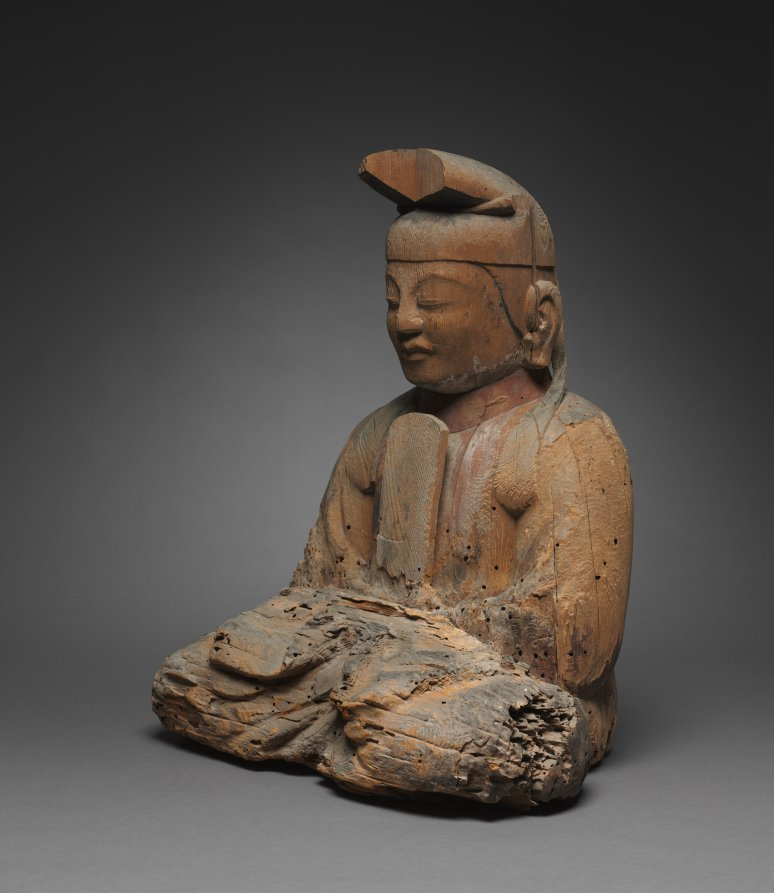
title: Shinto Deity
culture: Japan, Heian period (794–1185)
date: 900s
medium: wood, with traces of polychromy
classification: Sculpture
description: These sculptures represent kami, the name for deities associated with the Japanese religious tradition known as Shinto. They are said to have originally been created for the Usa Hachiman shrine in Oita on the island of Kyushu. Usa Hachiman Shrine houses four main kami: Hime Okami, who assists those engaged in agriculture and sea travel; the legendary 5th-century emperor Ojin deified as the kami Hachiman; Empress Jingu; and the kami of Mount Kawara, who aids copper miners. The identities of these two figures are unknown, but they belong to a larger group containing at least three other deities.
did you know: Traces of pigment on the surface of this sculpture indicate it was once painted.